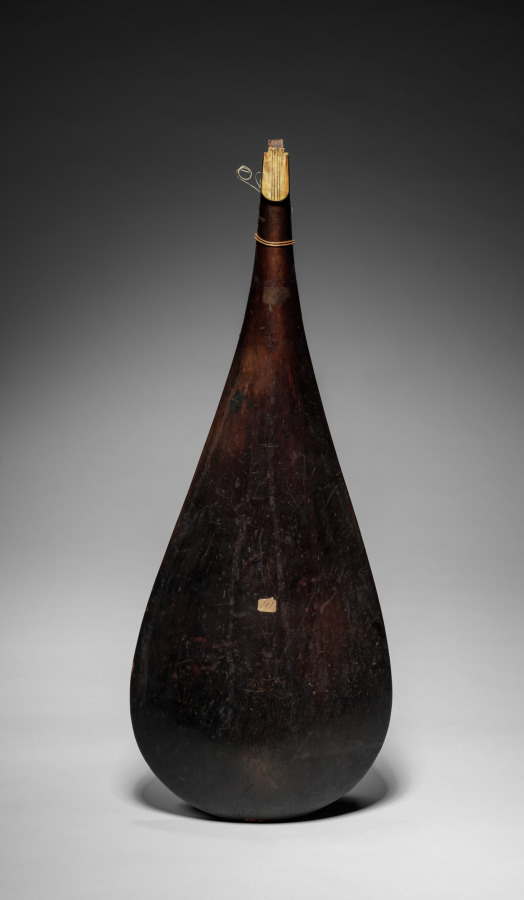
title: Liuxian Pipa (Six-String Pipa)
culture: China, Qing dynasty (1644-1911)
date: 1800s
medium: wood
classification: Musical Instrument